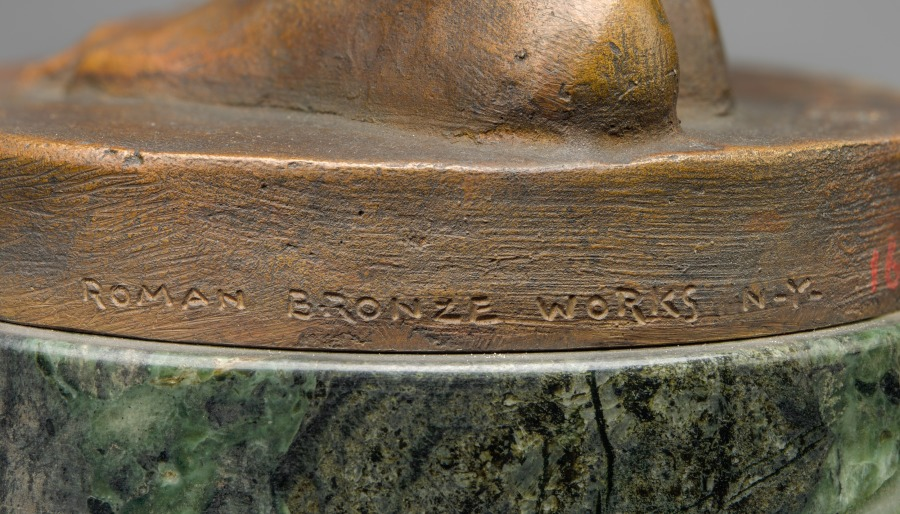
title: Eva, Study of a Nude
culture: America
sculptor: Emil Fuchs (American, born Austria, 1866–1929)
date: 1913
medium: bronze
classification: Sculpture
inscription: Signed on base: EMIL FUCHS 1913